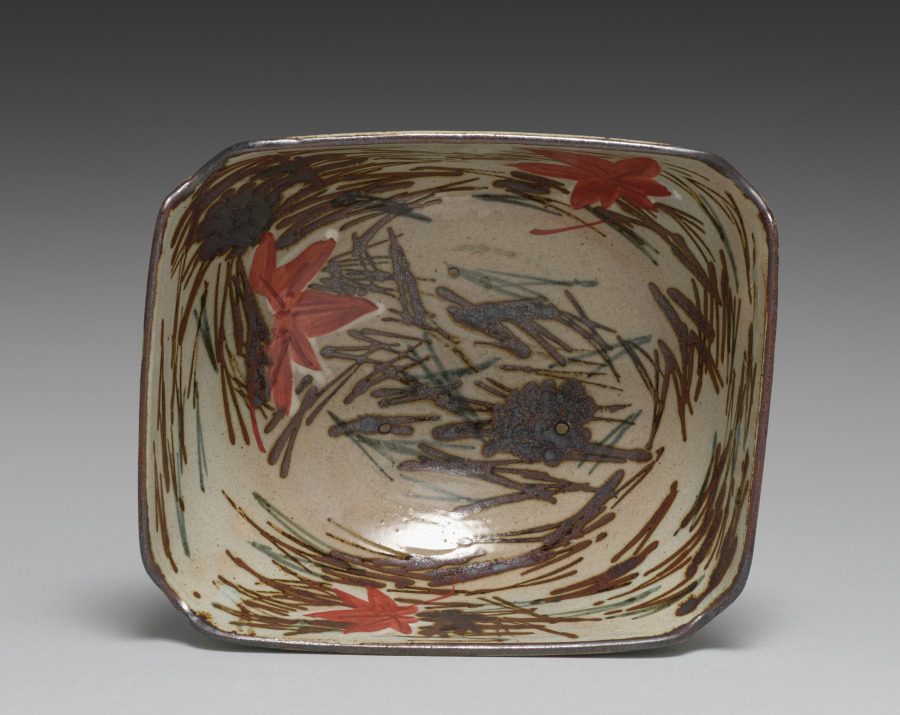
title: Nesting Dish with Scattered Pine Needles and Maple Leaves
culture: Japan, Edo period (1615–1868)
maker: Seifū Yohei I (Japanese, 1801–1861)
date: 1861–78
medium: One of a pair of side dishes; stoneware with underglaze blue and iron oxide, white slip, and overglaze color enamel (Kyoto ware)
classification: Ceramic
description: Seifū Yohei I made both blue and white porcelains after Ming dynasty (1368–1644) Chinese wares fired in the kilns at Jingdezhen for export. He also made colorful stoneware in the style of his teacher, Nin’ami Dōhachi (Takahashi Dōhachi II) (1783–1855).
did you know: Where he intended to place the maple leaves, Yohei I first applied a white color, which can be seen around the leaf edges under the glaze. This layering on top of the white brightens the color of the translucent red overglaze.